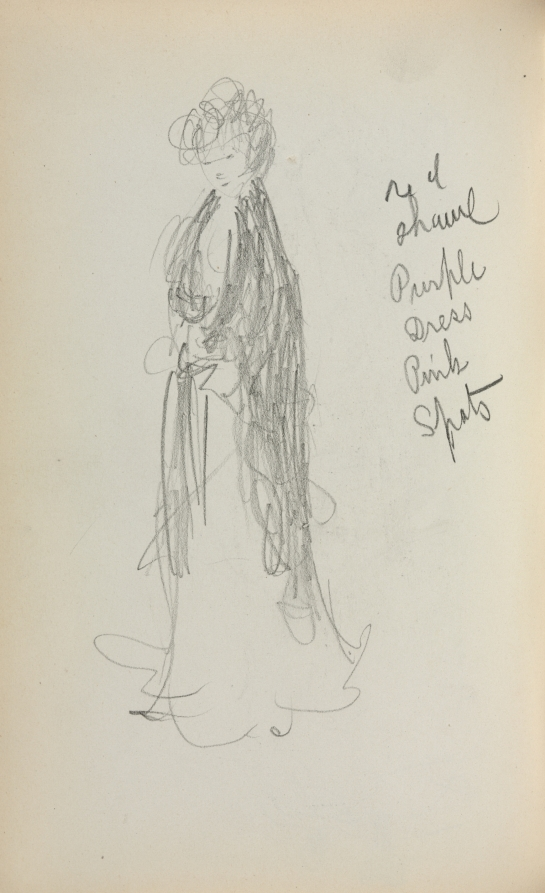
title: Italian Sketchbook: Standing Woman with Shawl (page 53)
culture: America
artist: Maurice Prendergast (American, born Newfoundland [now Canada], 1858–1924)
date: 1898–1899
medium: pencil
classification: Bound Volume